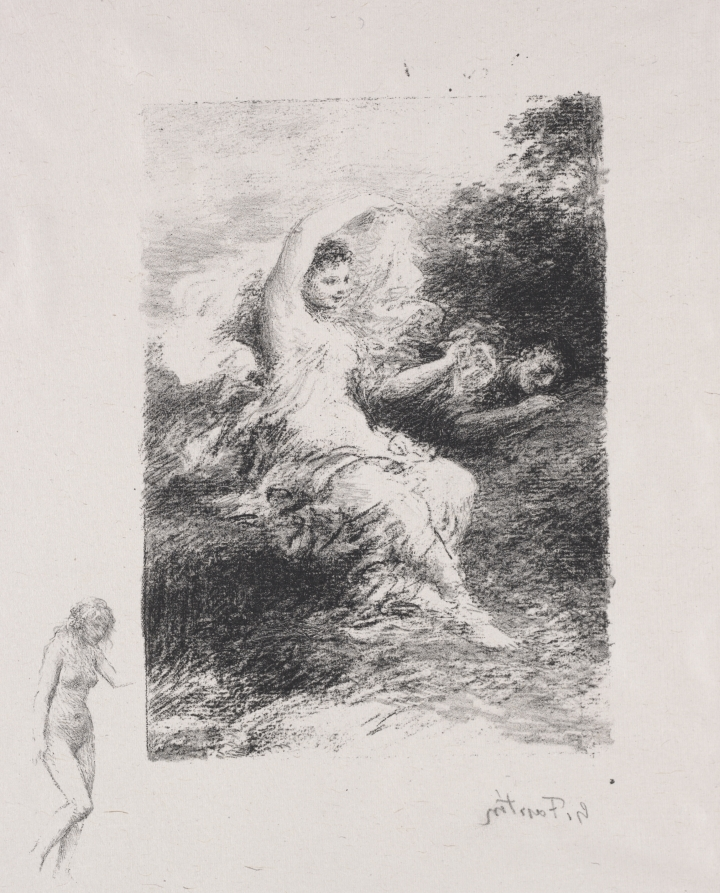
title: Lydé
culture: France, 19th century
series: Illustrations for the Poems of André Chénier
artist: Henri Fantin-Latour (French, 1836–1904)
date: c. 1905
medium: lithograph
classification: Print